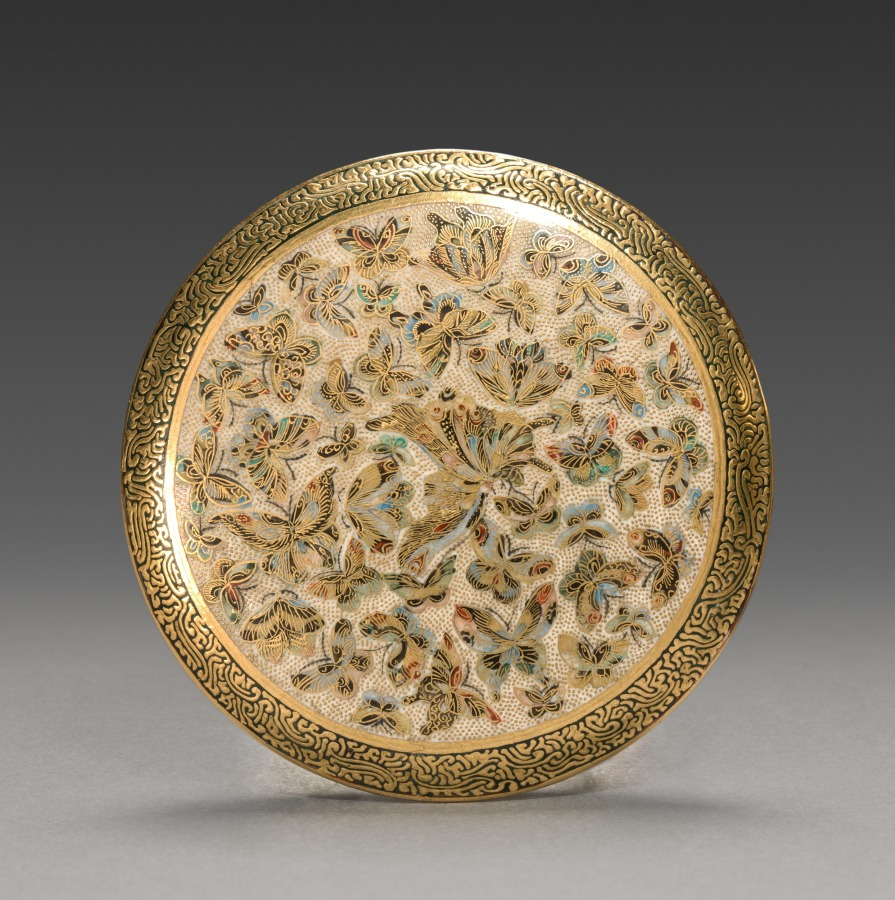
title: Jar with Butterflies (lid)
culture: Japan, Meiji period (1868–1912)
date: late 1800s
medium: pottery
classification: Ceramic